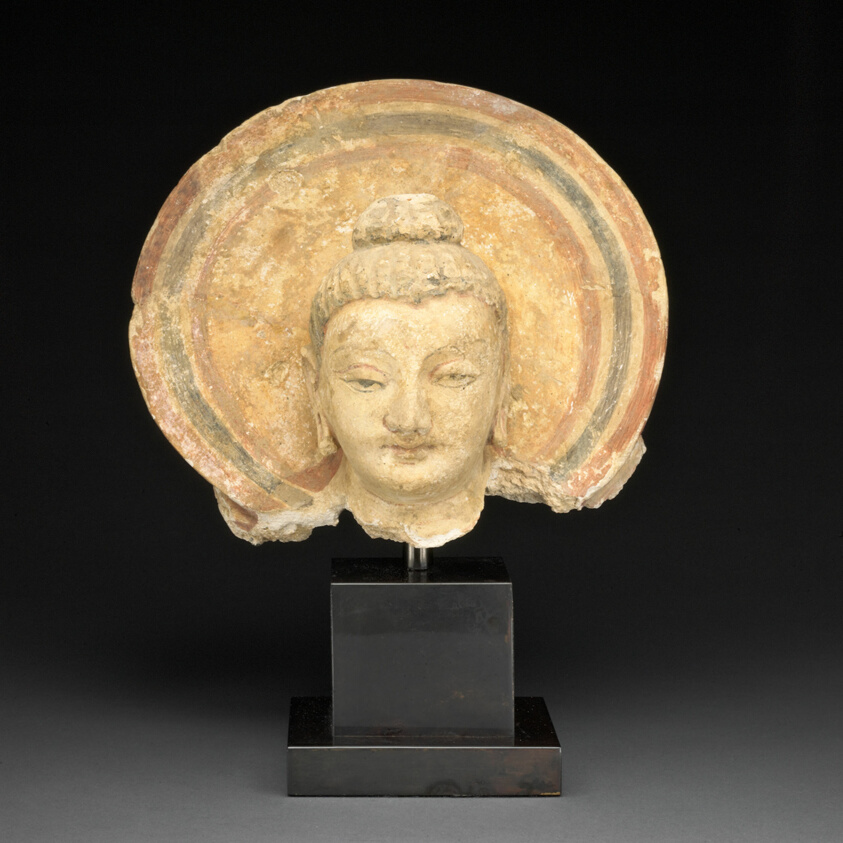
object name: Sculpture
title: Head of Buddha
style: South Asian, gandharan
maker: Afghanistan or Pakistan; Ancient region of Gandhara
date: 3rd/4th century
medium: Stucco with pigments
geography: Gandhara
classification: stuccowork; sculpture; asian art